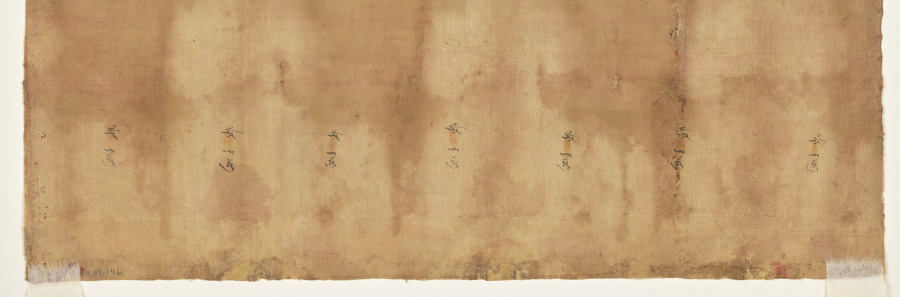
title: Portraits of Two Lineage Masters of the Kagyu Order: Phagmo Drupa (1110–1170) and Tashipel (1142–1210)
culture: Central Tibet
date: c. 1236–1310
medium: Gum tempera on sized cotton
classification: Painting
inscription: [1] ōṃ ŌṂ [2] sa rva vyid [3] svā hā// ōṃ [4] su pra ti ṣṭha vajra [5] svā hā// ye dha [6] rma he tu pra bha vā he tun te śan [7] ta tha ga to hya va tad de ṣan ca [8] yo ni ro dha ye vaṃ vā [9] ti ma [hā] śra [ma] ṇa// bzod [10] pa dka’ A thub bzod [11] daṃ pa ni[//] mya ngan ’das [12] ces sangs rgyas gsung// [13] rab tu byung ba gzhan la gnod pa ni dang// [14] gzhan la ’tshe HŪṂ ba de ni dge sbyong ma [15] yin no//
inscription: [1] ōṃ ŌṂ [2] sa rva vyid svā [3] hā// ōṃ su pra [4] ti ṣṭha vajra svā hā// [5] ye dha rma he tu pra bha vā he tun te śan ta tha ga to [6] hya va tad de ṣan ca yo ni ro dha e vaṃ vā ṭi ma hā [7] śra ma na ye// bzod pa dka’ thub [8] bzod pa daṃ pa ni// mya ngan pa [9] ’das ces A sangs rgyas gsung: [10] rab tu byung ba gzhan la gnod pa dang[//] gzhan la ’tshe ba [11] de ni dge sbyong ma yin HŪṂ no// ōṃ ma ni pad me hūṃ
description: High-level leaders of Buddhist monastic institutions were frequent portrait subjects of early thangka painting (devotional cloth scrolls) in Central Tibet. The lama (Tibetan monk) on the right founded Taklung Monastery in Lhasa, the capital of Tibet, which became an important institutional center of the Kagyu order. He is shown in discourse with his predecessor, whose teacher Gampopa (1079–1153), in turn, is the tiny gray-haired lama centered above them, between the colorful stylized mountain ranges. Their halos, lotus pedestal, and thrones with spitting elephant-trunked crocodiles and rearing griffins elevate them to the level of Buddhas and bodhisattvas. Despite their deification, they are still depicted with individualized facial features.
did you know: The Five Cosmic Buddhas in their six-armed forms are aligned at the top.